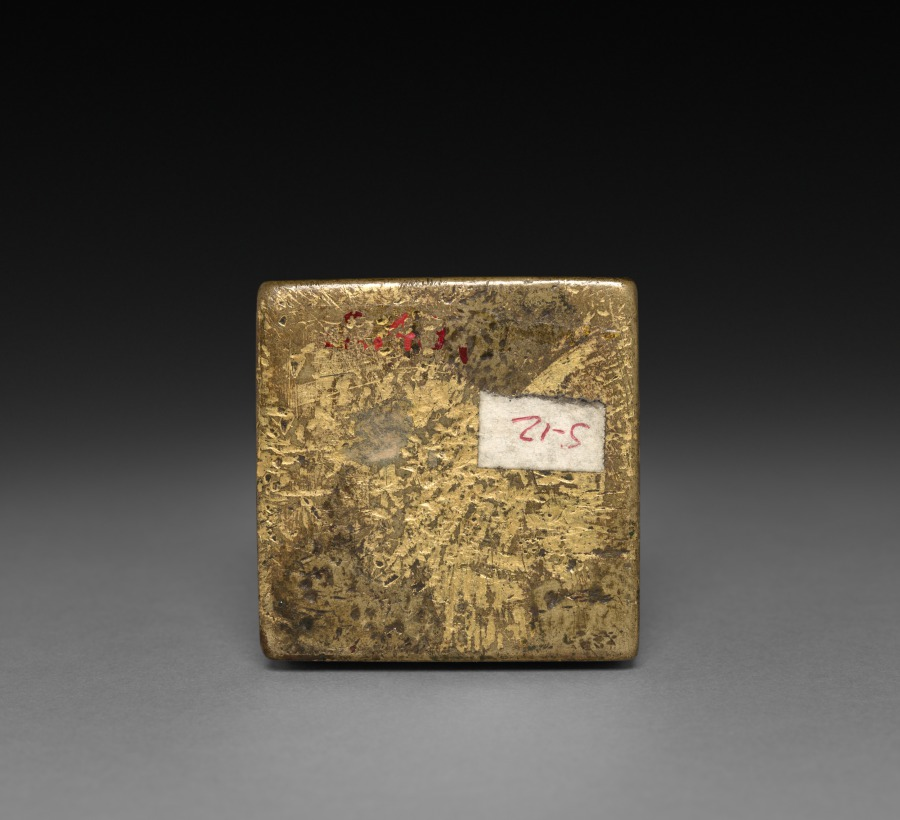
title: Seal, Lion-Dog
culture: China, Song dynasty (960-1279)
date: 960– 1279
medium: gilt bronze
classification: Metalwork